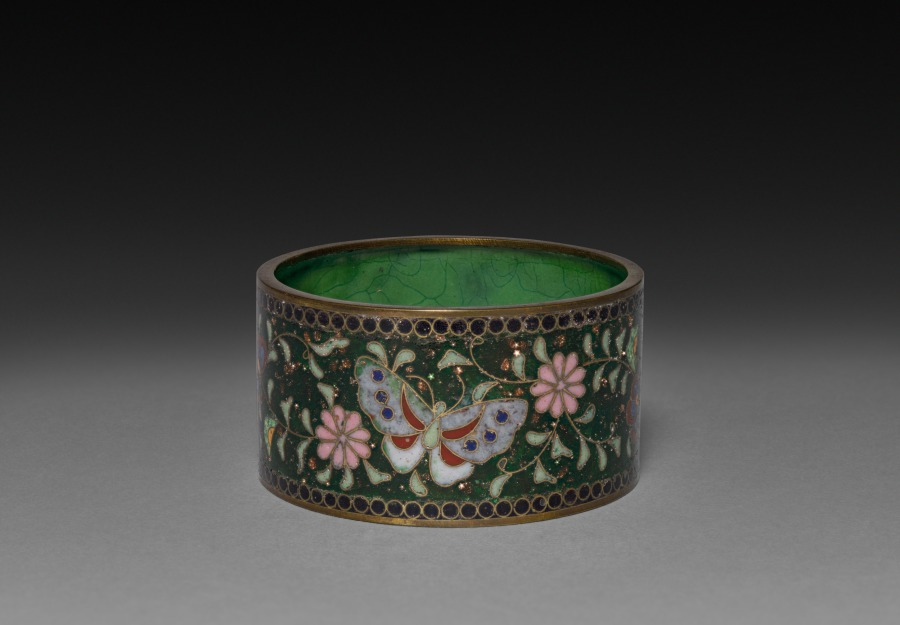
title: Napkin Ring with Butterflies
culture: Japan, Meiji period (1868–1912) or Taishō period (1912–26)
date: early 1900s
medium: cloisonne enamel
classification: Enamel